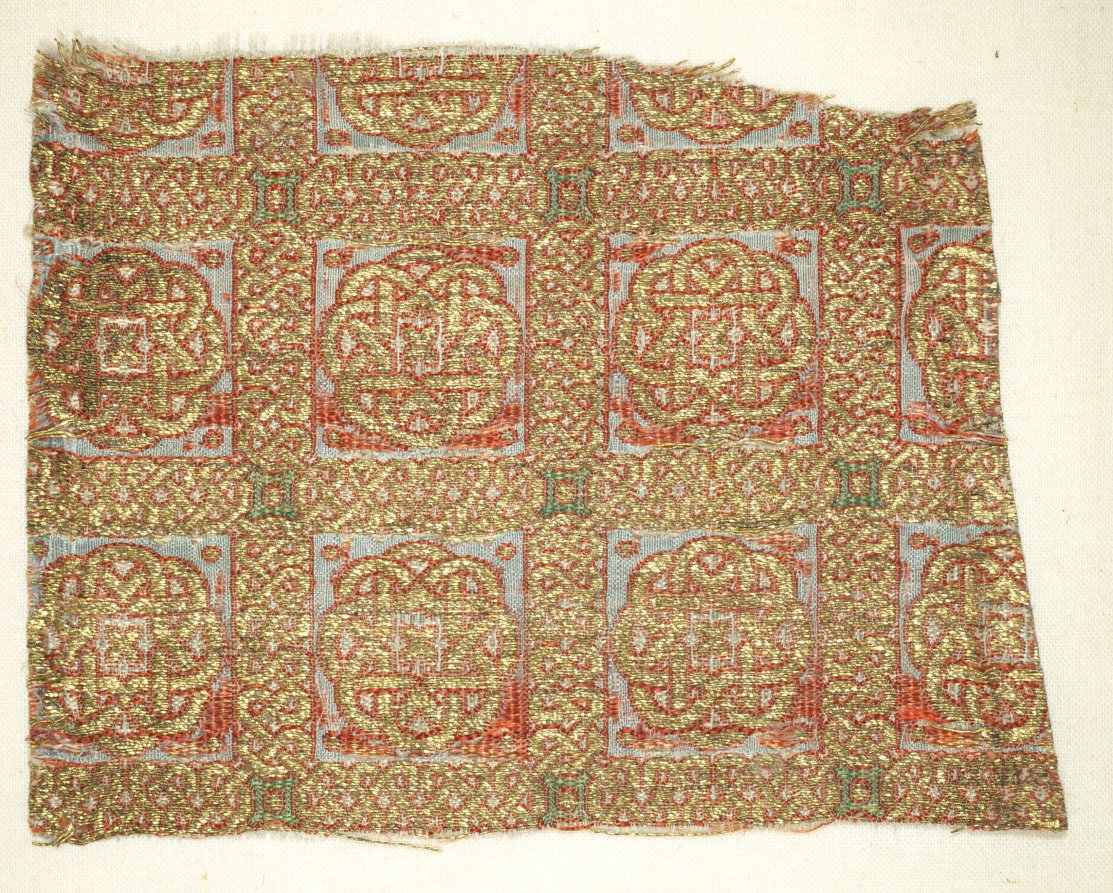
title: Fragment with stars in stacked squares, from a dalmatic of San Valero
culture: Spain, probably Almeria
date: 1200s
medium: lampas with areas of double cloth: silk and gold thread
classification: Textile